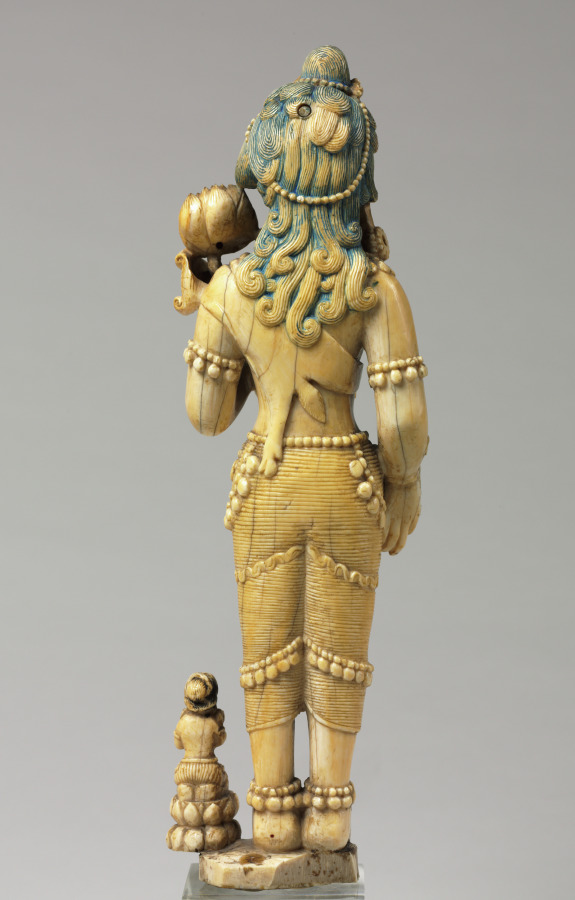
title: Bodhisattva of Compassion (Avalokiteshvara)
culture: Tibet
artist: Choying Dorje, the Tenth Black Hat Karmapa (Tibetan, 1604–1674)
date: 1647–48 or 1658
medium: ivory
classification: Ivory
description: Choying Dorje was one of the most influential monastic leaders in the history of Tibetan Buddhism. Known as the Tenth Karmapa, he was the head of the Karma Kagyu order of monks. His biographies state that from a young age he had a talent and passion for carving and painting images of bodhisattvas and other enlightened beings. Several of his original works survive, including this exceptionally rare ivory carving of Avalokiteshvara holding a lotus. Stylistically it is related to images from southwestern China, where he stayed in exile from 1647 to 1648 in the wake of Mongol invasions that destroyed many Kagyu monasteries in Tibet. While there he was exposed to Chinese art, which was favored by his patrons. The face has the distinctive elongation unique to Dorje's personal style. This sculpture could have been made during his time of exile or a decade later after his return to Tibet.